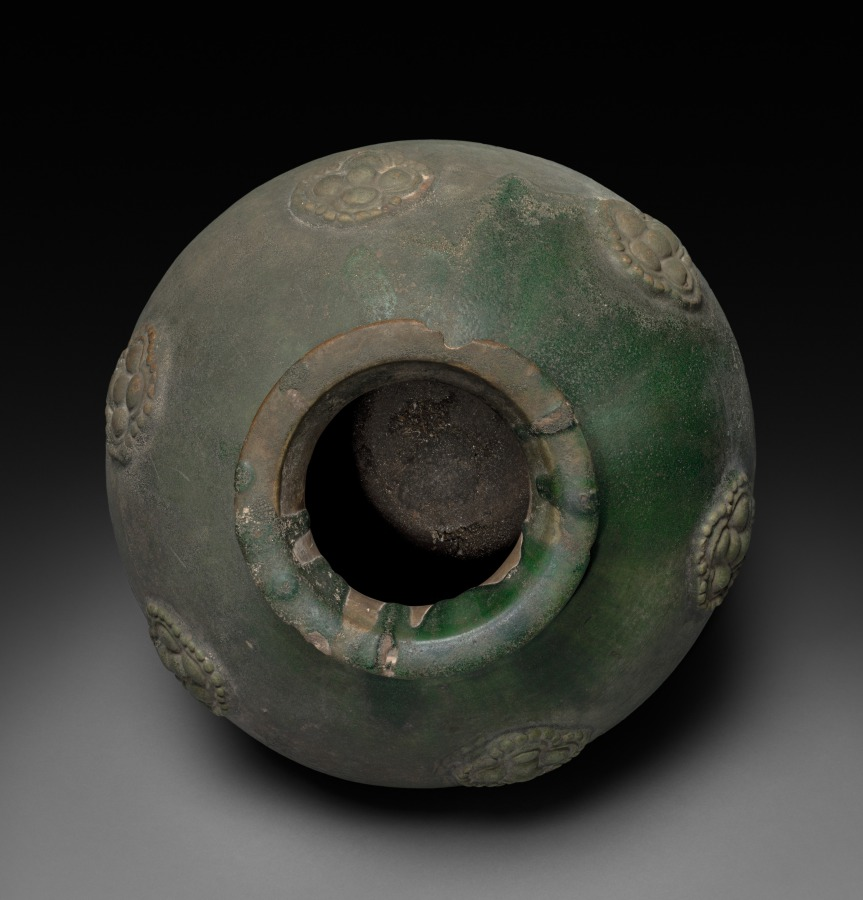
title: Jar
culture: China, Six Dynasties period (265-589) or Sui dynasty (581-618)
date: 500s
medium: glazed earthenware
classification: Ceramic